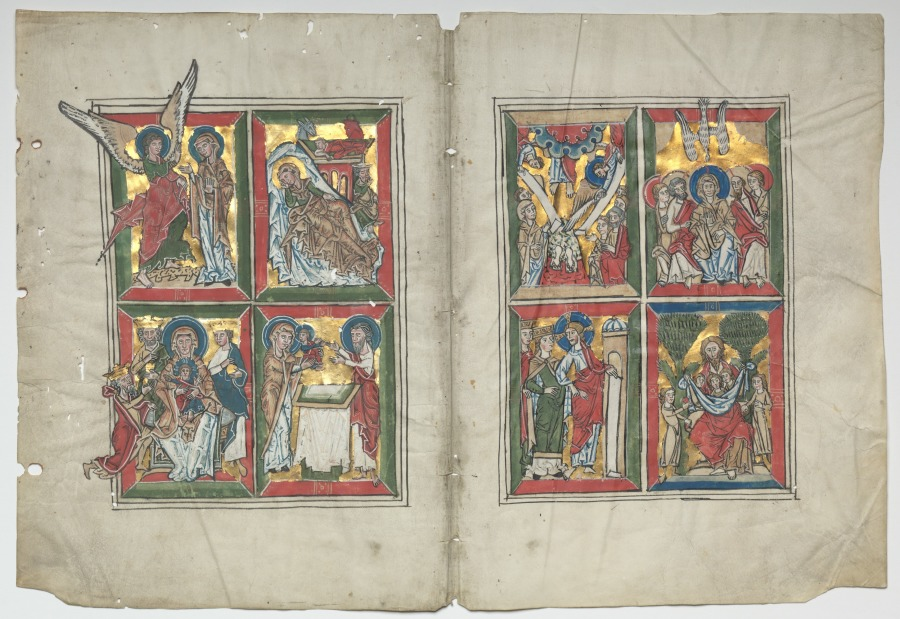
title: Bifolia with Scenes from the Life of Christ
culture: Germany, Lower Saxony (Diocese of Hildesheim), Braunschweig(?), 13th century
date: 1230–1240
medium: tempera, and gold on vellum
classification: Manuscript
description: This pair of bifolia consists of two sheets of vellum each folded in half to create four leaves. In the bound volume, they would have originally been inserted one inside the other to form part of a large psalter or book of the psalms. The miniatures decorating each leaf are subdivided into four small panels and sequentially illustrate the life of Christ. This particular format, along with aspects of style, help us locate the psalter’s place of production to North Germany and the Diocese of Hildesheim. In northern Europe, after 1050, a tradition emerged of illustrating psalters with miniature cycles of the life of David (the author of the Psalms) and the life of Christ. This juxtaposition implied the connection of lineage, since Christ was the descendant of the House of David. It is possible that in the parent volume these miniatures were accompanied by a “David” cycle.